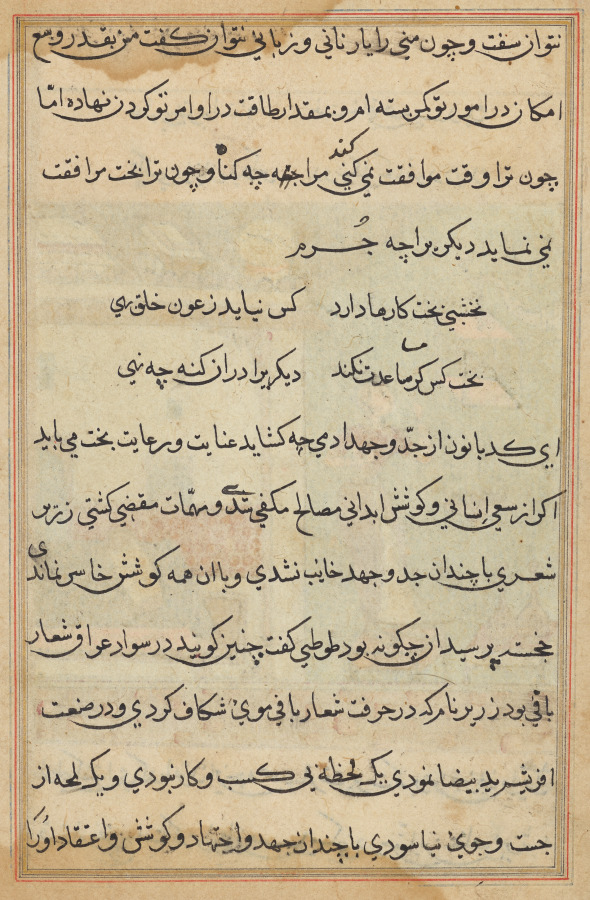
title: Tuti-Nama (Tales of a Parrot)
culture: Mughal India, court of Akbar (reigned 1556–1605)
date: c. 1560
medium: gum tempera, ink, and gold on paper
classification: Painting